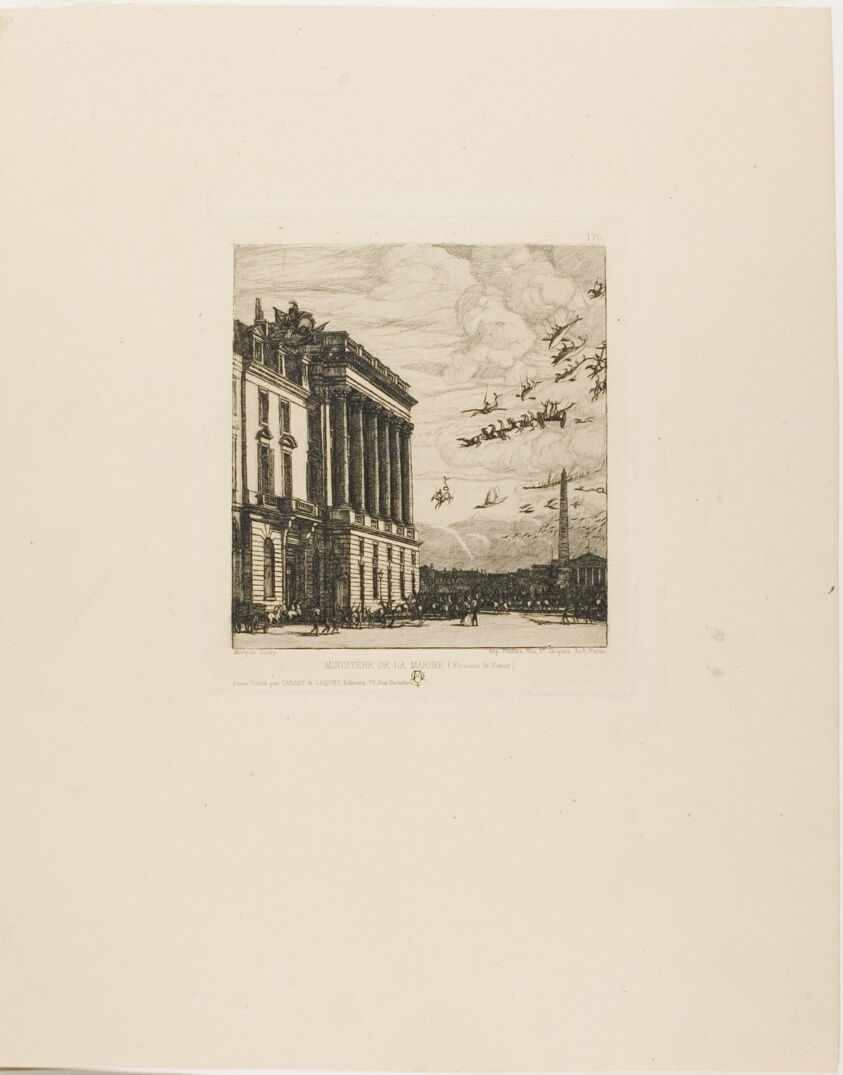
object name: Print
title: The Admiralty, Paris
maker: Charles Meryon (French, 1821-1868); printed by Auguste Delâtre (French, 1822-1907); published by Cadart & Luquet, Editeurs (French, 19th century)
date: 1865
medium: Etching on ivory laid paper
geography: France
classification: etching; print; prints and drawing